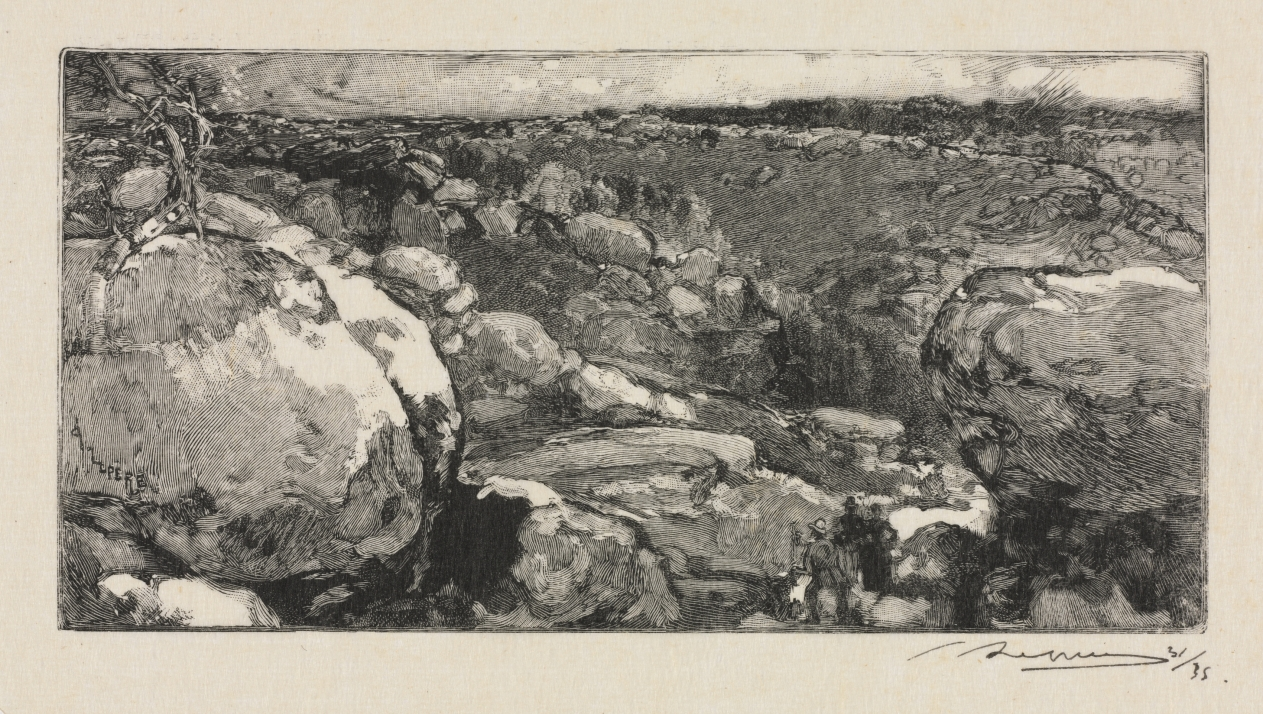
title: Fontainebleau Forest: The Cirque of Long-Rocher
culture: France, 19th century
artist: Auguste Louis Lepère (French, 1849–1918)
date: 1888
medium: wood engraving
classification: Print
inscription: lower right margin, in pen: "A Lepere 31/35" lower margin, in pencil, in another hand: "Le cirque du long Rocher"